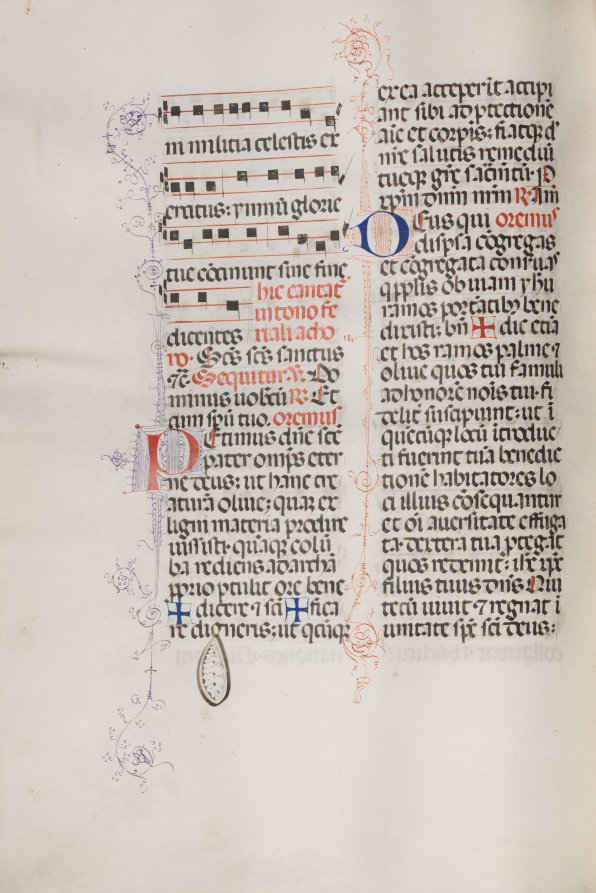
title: Missale: Fol. 112v: contains some music as part of Palm Sunday liturgy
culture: Italy, Perugia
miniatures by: Bartolommeo Caporali (Italian, c. 1420–1503)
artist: assisted by Giapeco Caporali (Italian, d. 1478)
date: 1469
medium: ink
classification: Bound Volume